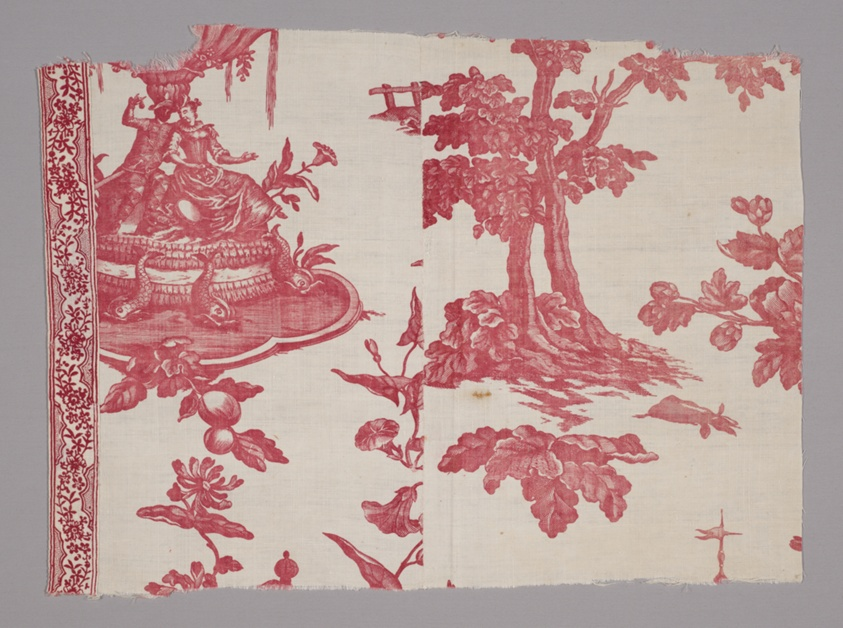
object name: Coverings and Hangings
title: Curtain Fragment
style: 18th Century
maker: England and possibly India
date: late 18th century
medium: Cotton; copperplate printed; block printed trimming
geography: England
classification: weaving - printed; textile; printed textile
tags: Chinoiserie, fountains, flowers, floral motifs, trees